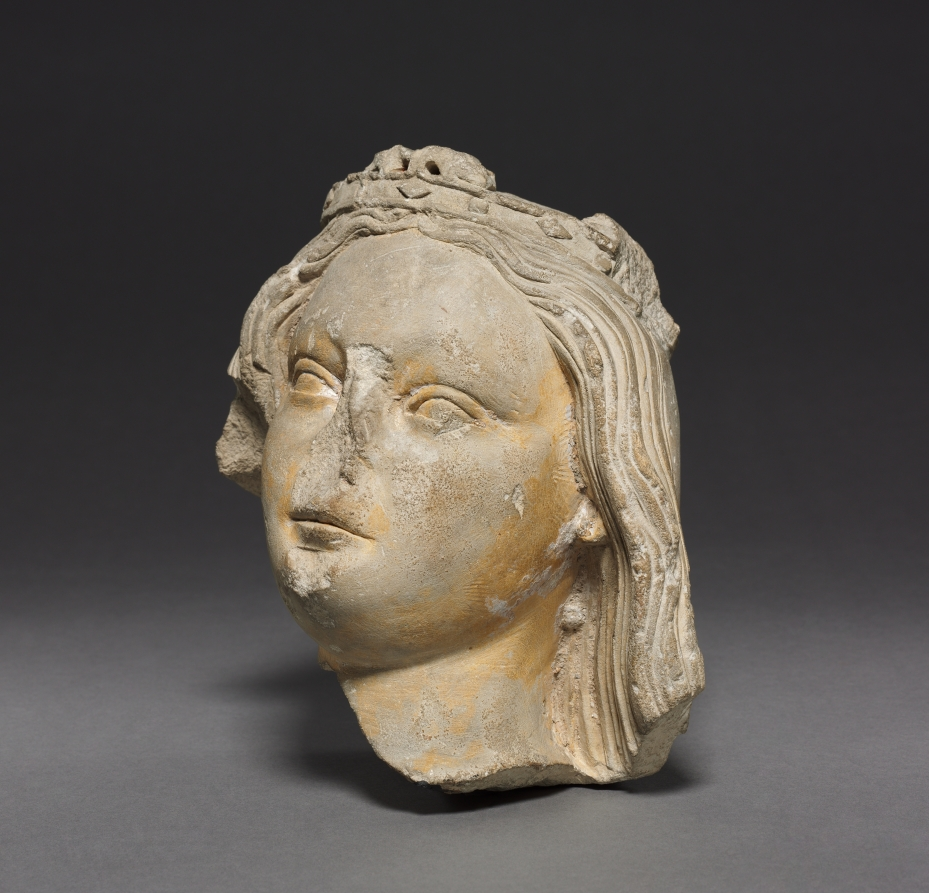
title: Crowned Female Head (Fragment)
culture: France, Champagne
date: c. 1400–1420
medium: limestone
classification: Sculpture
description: The origins of this sculptural fragment are not known. It is perhaps the final trace of the once beautiful figure of a standing Virgin and Child.